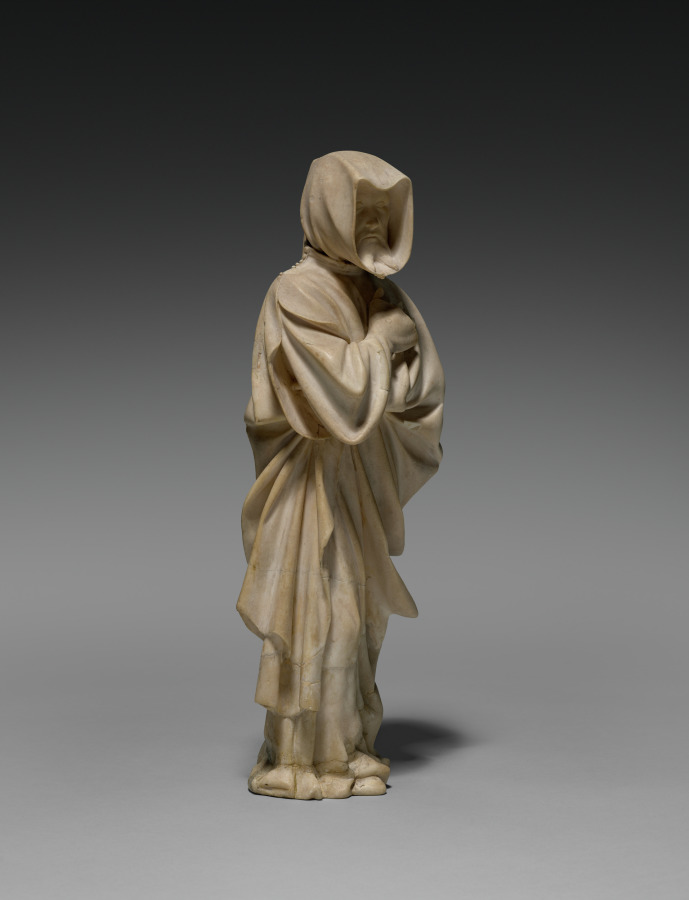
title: Mourner from the Tomb of Philip the Bold, Duke of Burgundy (1364–1404)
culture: Netherlands, active Dijon, 15th century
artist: Claus de Werve (Netherlandish, 1380–1439)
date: 1404–10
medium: vizille alabaster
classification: Sculpture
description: This figure comes from the tomb of Duke Philip the Bold from the church of Champmol near Dijon (Burgundy, France). Philip, who founded the monastery and designated it as his burial place, hired the best artists, many of whom came from the Netherlands. While the commission was given in 1381, the work was not completed until 1410, six years after the duke’s death. This mourner is unusual for the time because it is not carved as a static low relief on the pedestal of the tomb but interacts with the viewers and their fellow procession members. The lifelike quality of the figure is due in large part to the alabaster. Its softness allowed artists to carve details into the material, and the transparent, milky white stone could also be polished to a high gloss.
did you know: A plaster cast of this mourner decorates the empty niche in the Tomb of Philip the Bold in Dijon, France.